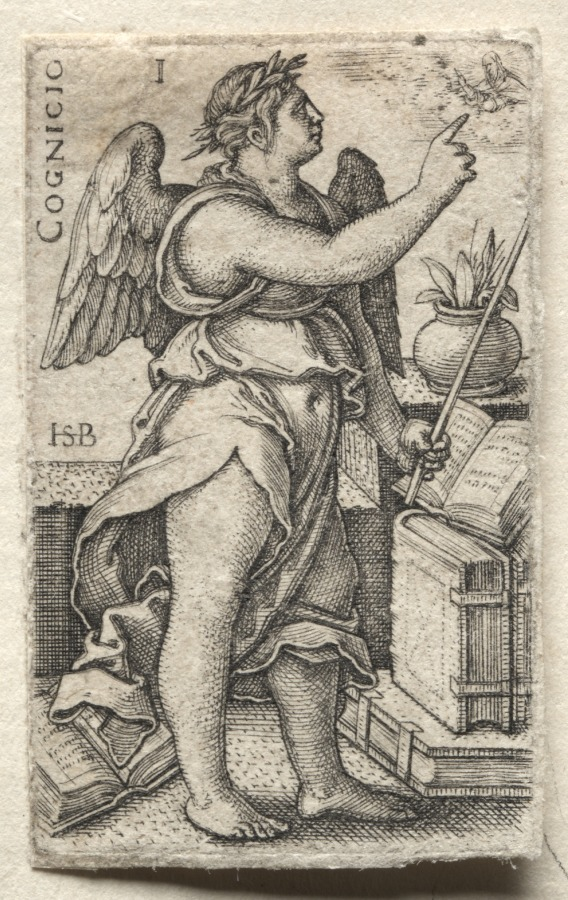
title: The Knowledge of God and the Seven Cardinal Virtues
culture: Germany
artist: Hans Sebald Beham (German, 1500–1550)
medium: engraving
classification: Print